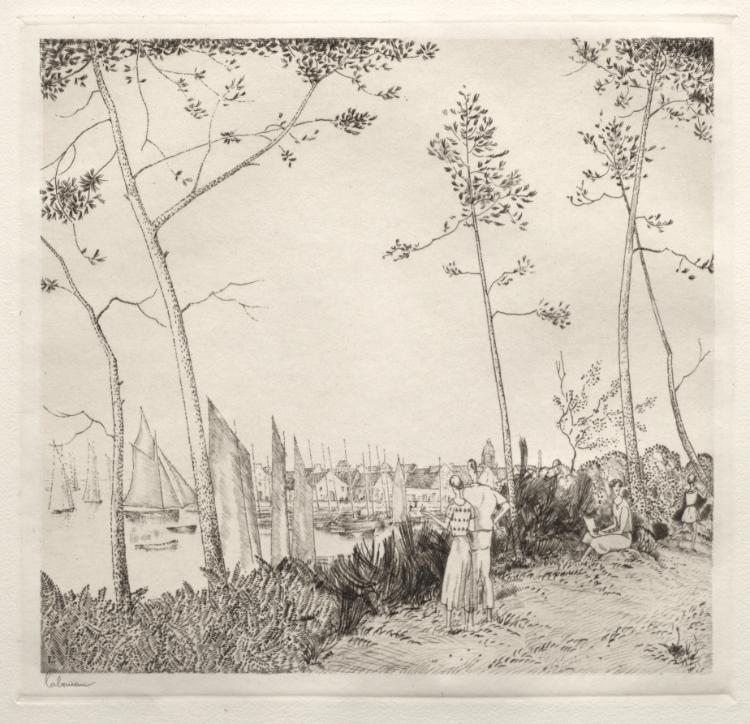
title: La Promenade sur le Port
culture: France, 20th century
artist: Jean-Émile Laboureur (French, 1877–1943)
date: 1935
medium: etching and line engraving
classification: Print